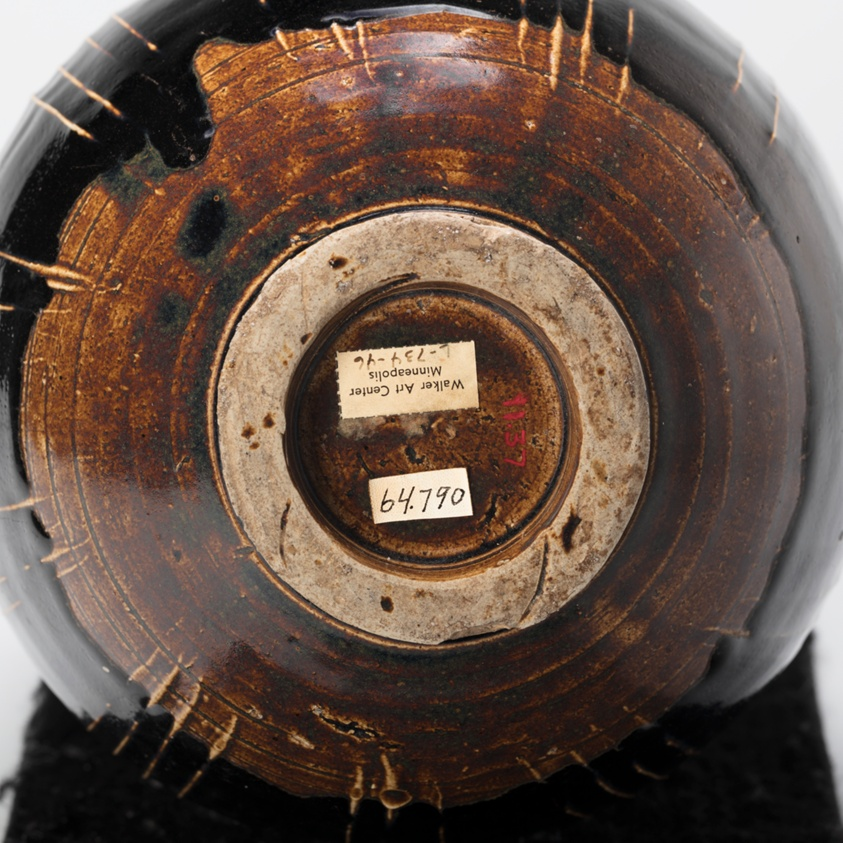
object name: Vessel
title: Ovoid Jar with Vertical Ribs and Two-Loop Handles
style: Chinese (culture or style)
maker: China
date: Northern Song (960–1127) or Jin dynasty (1115–1234), 12th/13th century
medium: Northern black ware; Cizhou type; glazed stoneware with trailed white slip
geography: China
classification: stoneware; asian art; ceramics; vessel